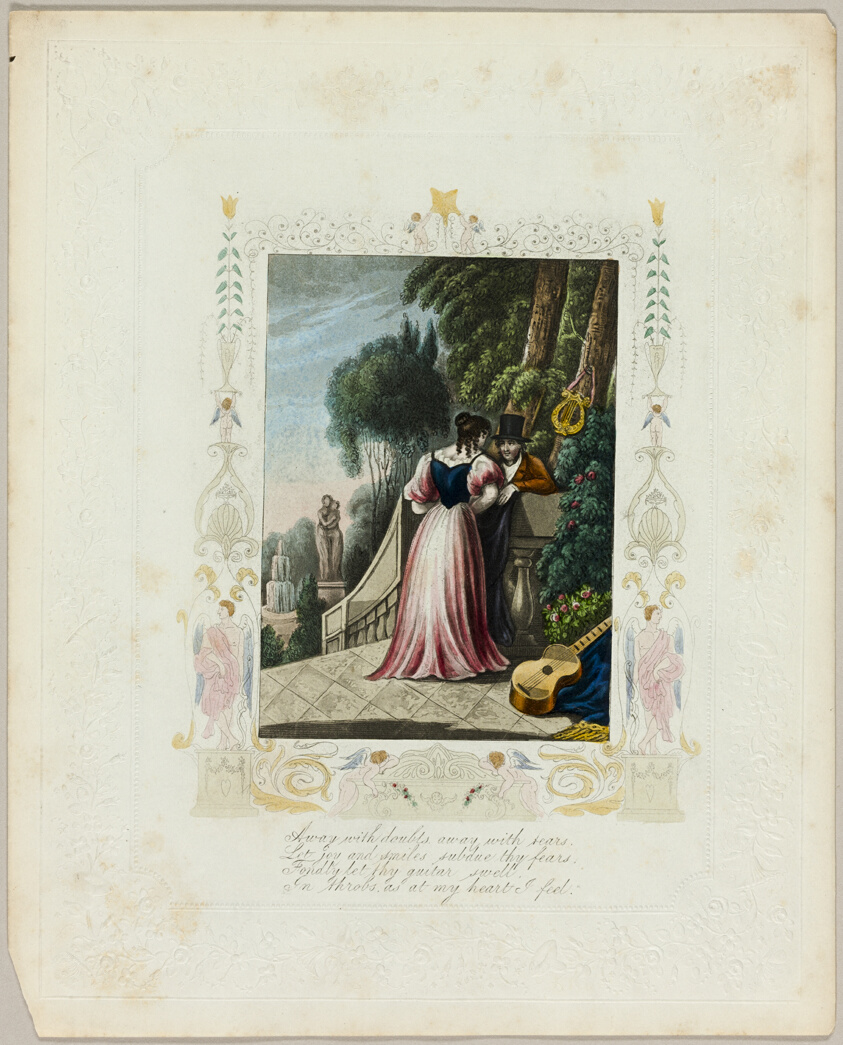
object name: Print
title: Away with Doubts (valentine)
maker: Unknown Artist; English, 19th century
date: c. 1840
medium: Lithograph with hand-coloring on embossed ivory wove paper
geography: England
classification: valentine; prints and drawing; print